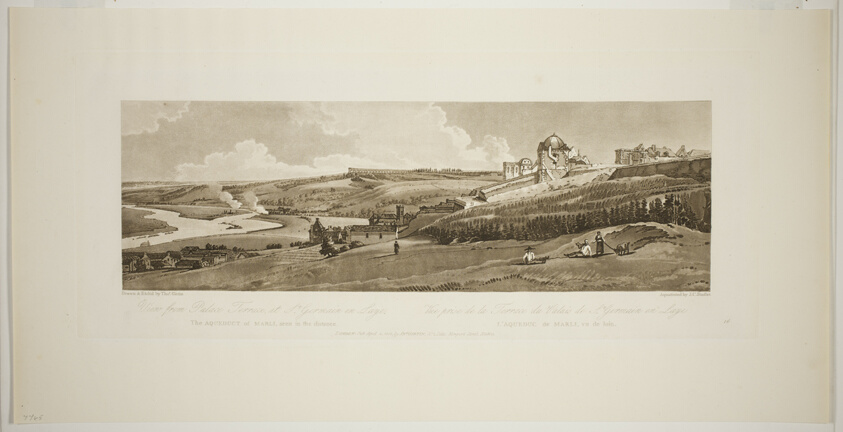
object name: Print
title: View from Palace Terrace at Saint Germain on Laye, from Twenty Views in Paris and its Environs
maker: Thomas Girtin (English, 1775-1802); aquatint by Joseph Constantine Stadler (German, active 1780 and 1812)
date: published 1802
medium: Etching and aquatint in brownish black on cream wove paper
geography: England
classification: etching; paper; print; prints and drawing